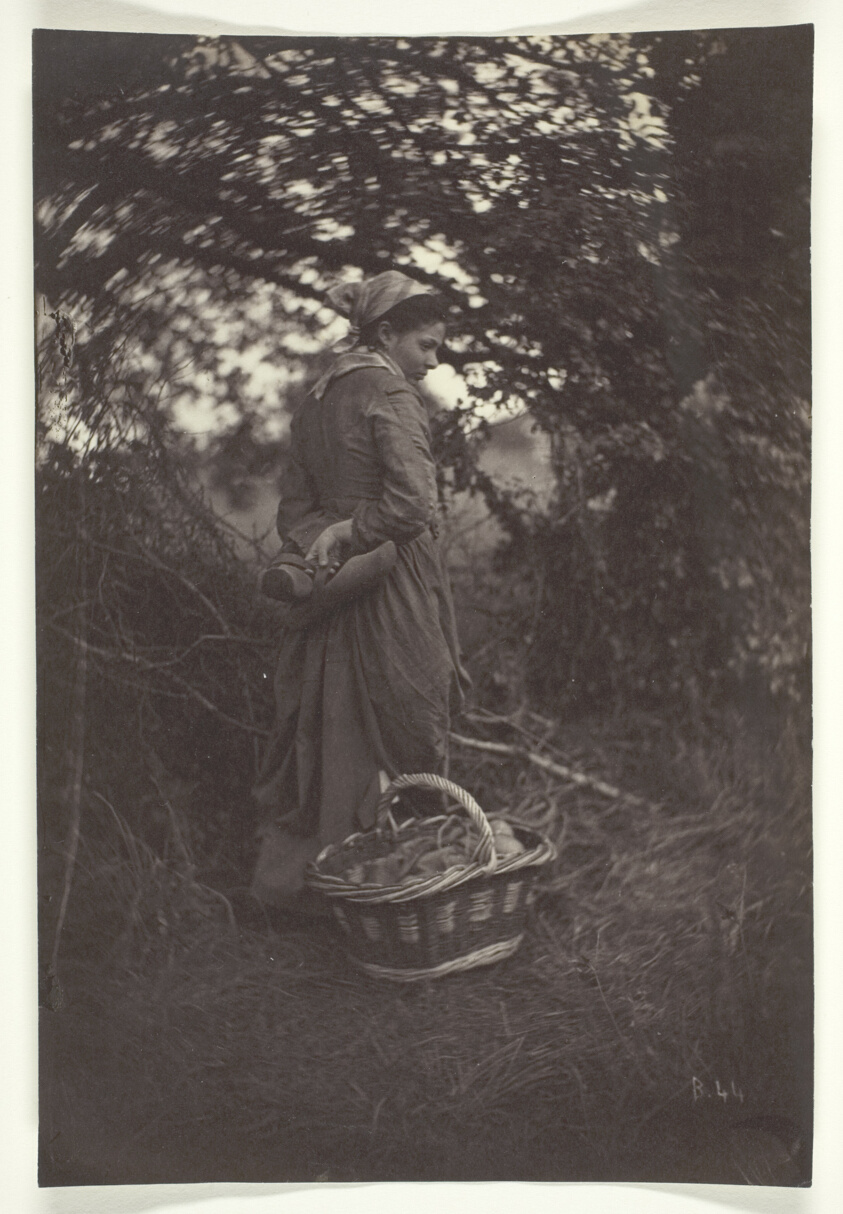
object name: Photograph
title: Woman Standing with Basket on Ground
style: 19th century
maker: Giraudon’s Artist; French, active c. 1875–1880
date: 1870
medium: Albumen print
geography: France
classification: photograph; albumen silver print; photography